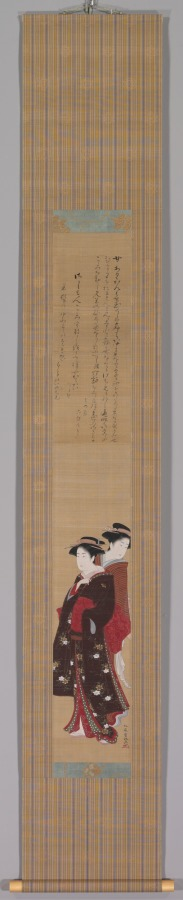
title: Two Beauties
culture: Japan, Edo period (1615–1868)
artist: Kitao Shigemasa (Japanese, 1739–1819)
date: late 1700s–early 1800s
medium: hanging scroll, pillar painting: ink and color on silk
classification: Painting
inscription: Artist's signature and seal, lower right corner. Poem inscribed on upper section of scroll.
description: Shigemasa favored using colors in broad opaque masses, as seen here in the beauties’ robes. He was a painter, printmaker, and poet, specializing in courtesan and actor prints. The format of this hanging scroll or "pillar painting" allows for the work to be hung on a pillar in a Japanese home.